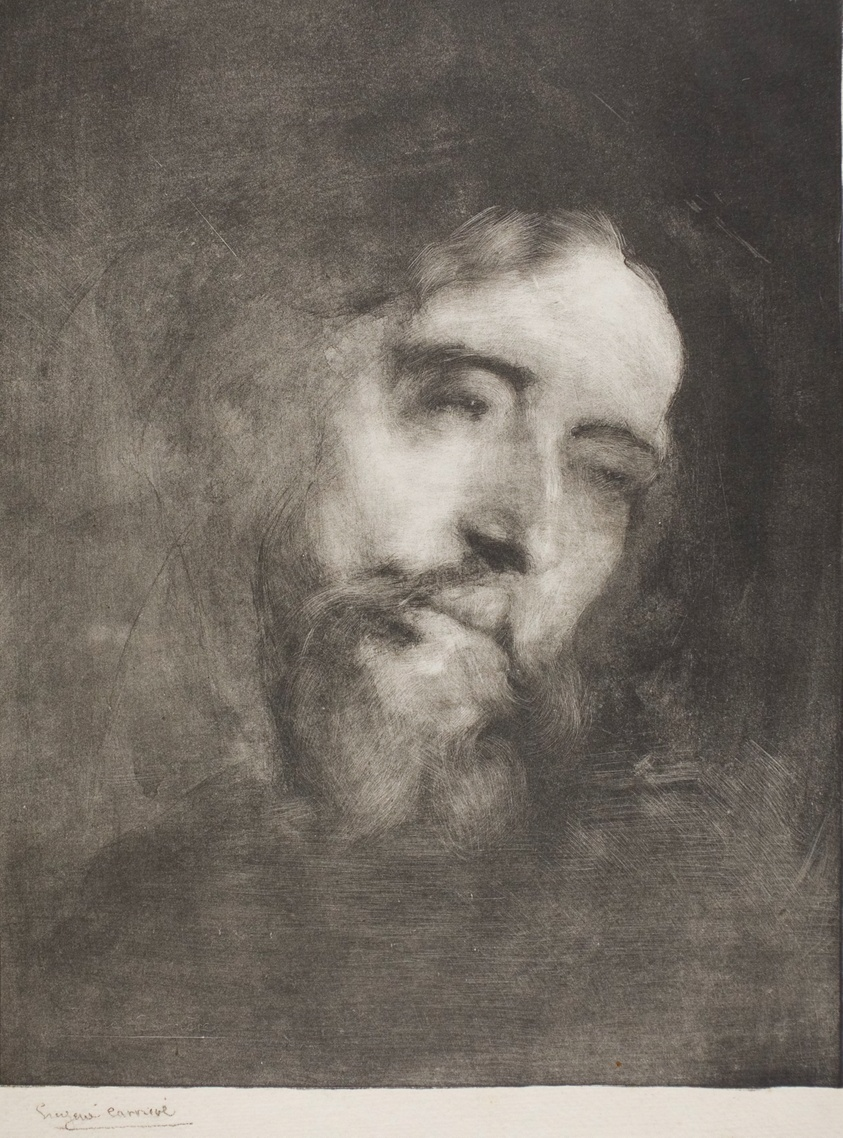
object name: Print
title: Alphonse Daudet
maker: Eugène Carrière (French, 1849-1906); published by L'Estampe originale (French, 1893-1895)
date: 1893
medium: Lithograph in black on China paper laid down on heavy cream wove paper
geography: France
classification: lithograph; print; prints and drawing